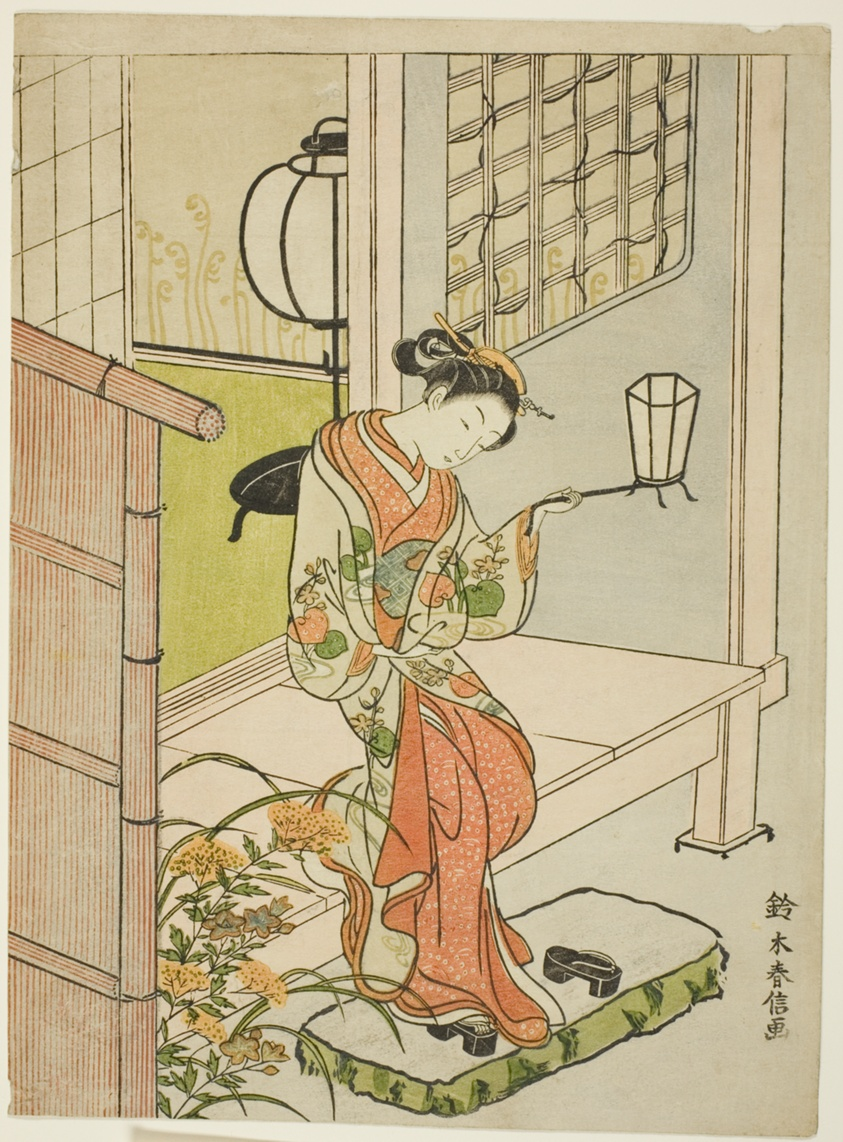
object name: Print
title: Woman Stepping Out with a Lantern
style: Japanese (culture or style)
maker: Suzuki Harunobu 鈴木 春信; Japanese, 1725 (?)-1770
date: c. 1767/68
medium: Color woodblock print; chuban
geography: Japan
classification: woodblock print; print; asian art